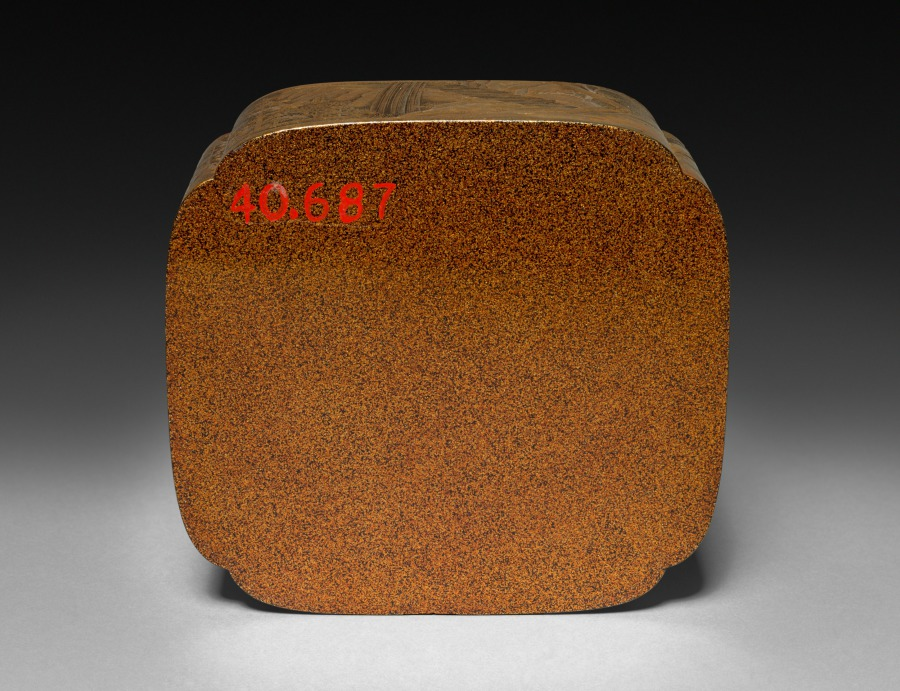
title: Box (bottom)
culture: Japan, Meiji period (1868–1912)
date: late 1800s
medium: wood with lacquer and gold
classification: Lacquer